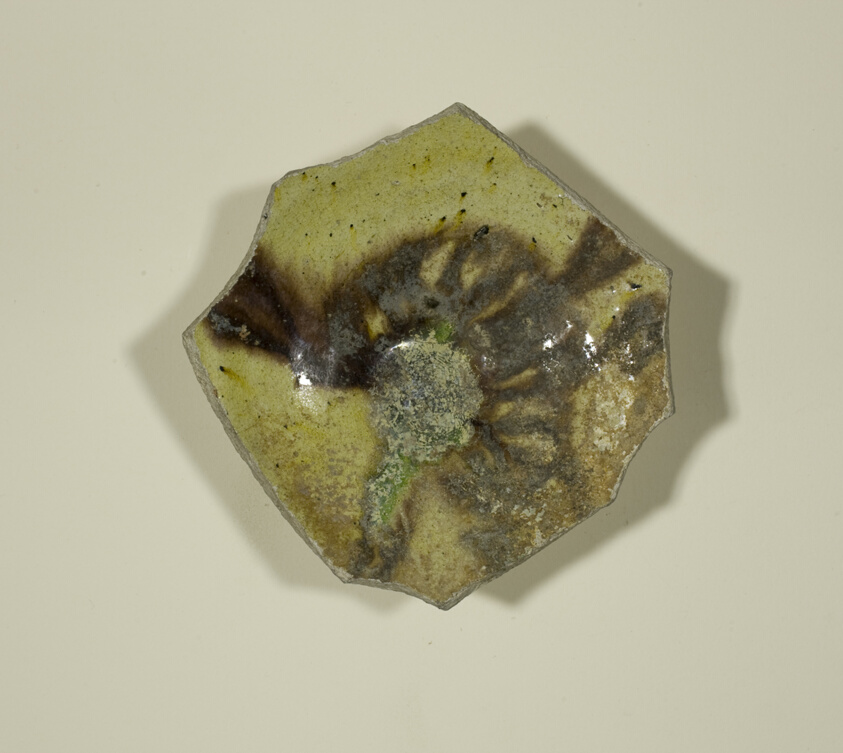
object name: Decorative Arts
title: Fragment of a Bowl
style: byzantine, european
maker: Byzantine (Greece, Serres or Cyprus)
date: 13th-14th century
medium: Ceramic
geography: Byzantine Empire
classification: fragment; ceramics; vessel; bowl; asian art; decorative arts